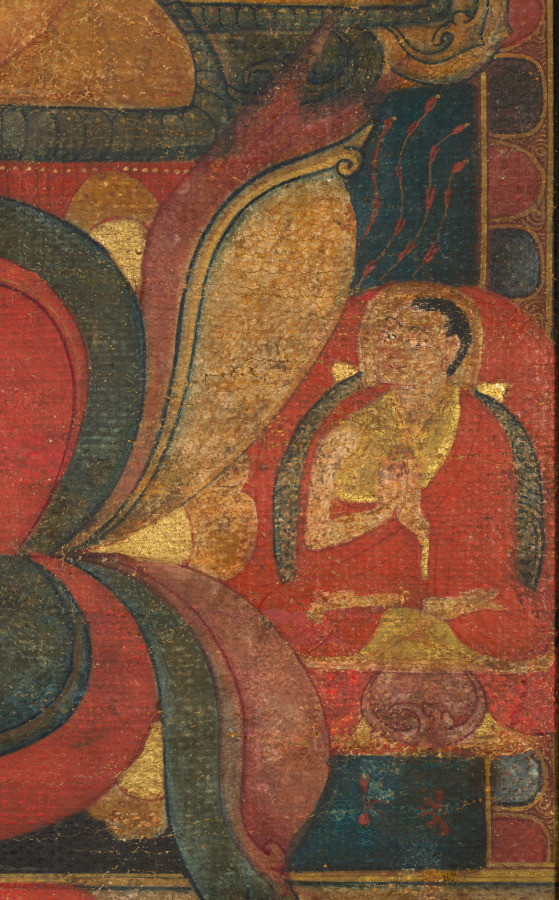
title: Tantric Buddha Vairochana as Vajrasattva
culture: Central Tibet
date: c. 1150–1200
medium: gum tempera, ink, and gold on cloth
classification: Painting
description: The seated Buddha dominating the composition is identified as Vairochana because of his hand gesture, the mudra communicating supreme enlightenment in which the index finger of one hand is grasped by the fingers of the opposite hand. His golden color and the tiny vajra—a six-pronged ritual object representing a thunderbolt—balanced on top of his finger suggest that he is in the guise of Vajrasattva, the summation of all enlightened beings. In his crown is the image of a monk, who is probably the guru of the donor, the small monastic figure at the lower right next to the lotus pedestal.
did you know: A mantra written behind the figures invokes their living presence in the thangka painting.